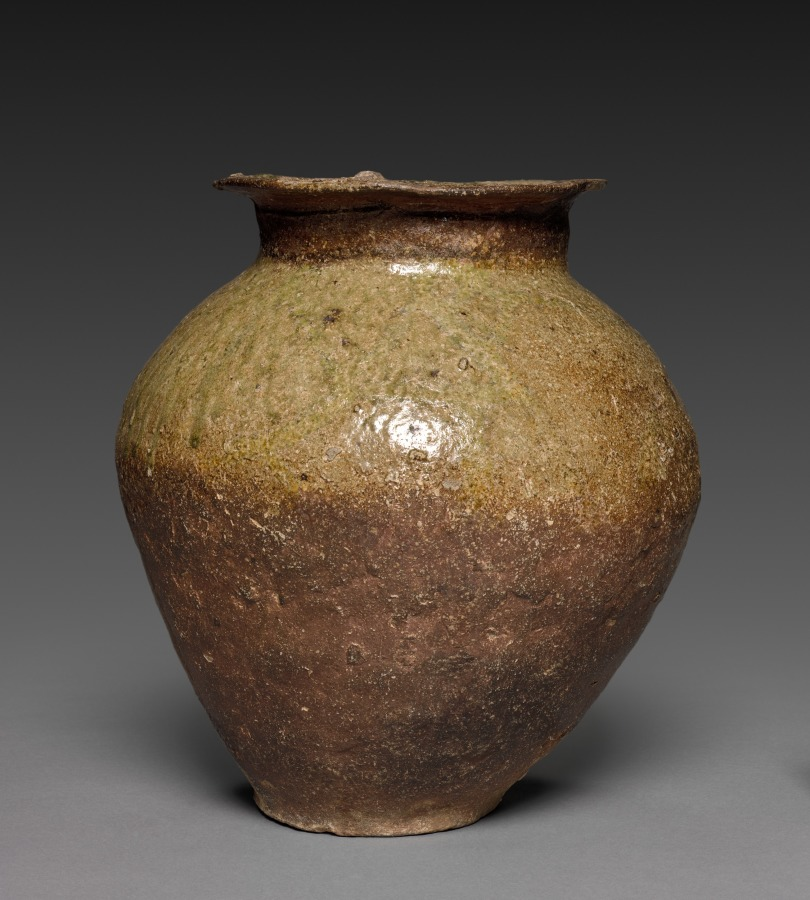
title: Storage Vessel: Tokoname Ware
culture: Japan, Heian period (794–1185)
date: 1100s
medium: stoneware with natural ash glaze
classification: Ceramic